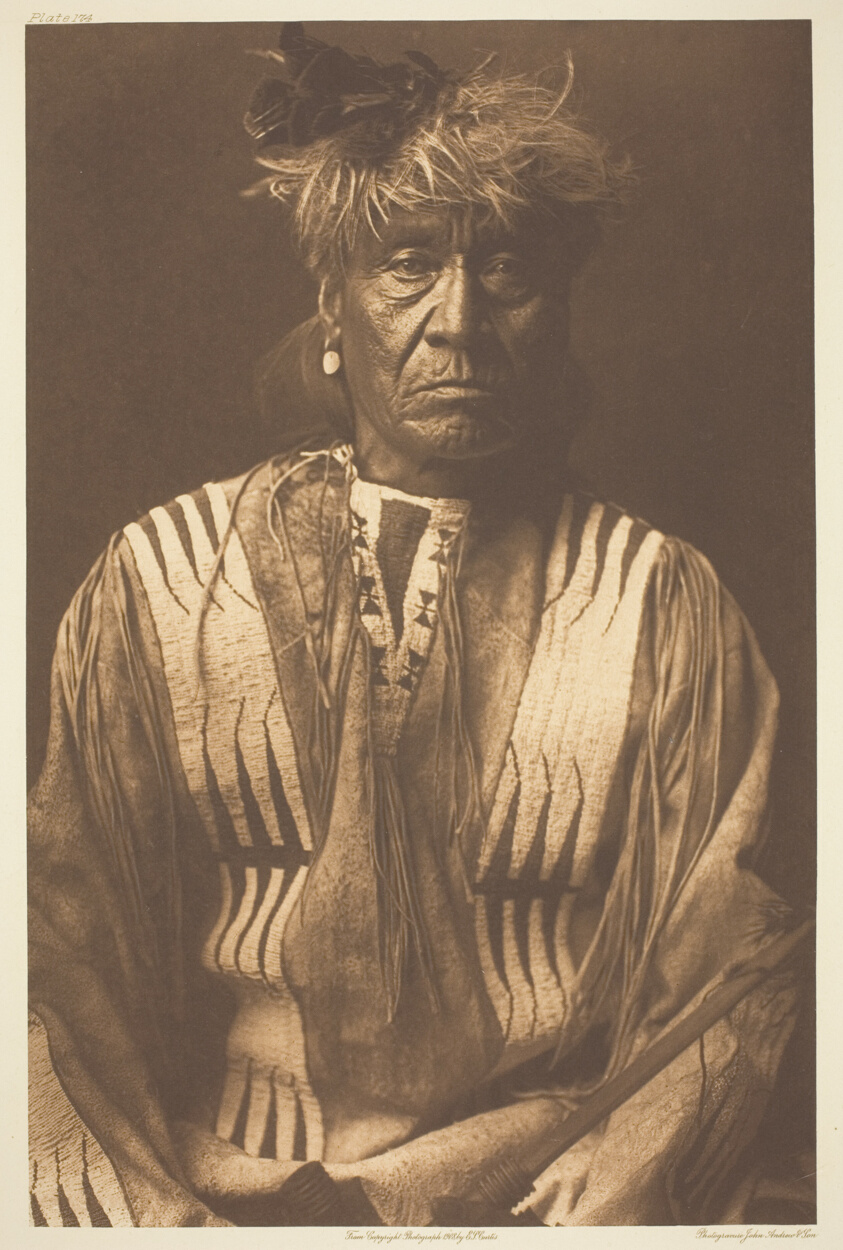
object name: Photograph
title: Red Whip - Atsina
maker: Edward S. Curtis (American, 1868–1952)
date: 1908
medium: Photogravure, plate 174 from "The North American Indian, Volume 5" (1909)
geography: United States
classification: photogravure; photomechanical process; photography; photograph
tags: portraits, portraits: male subject, photography, portraits: Native American subject